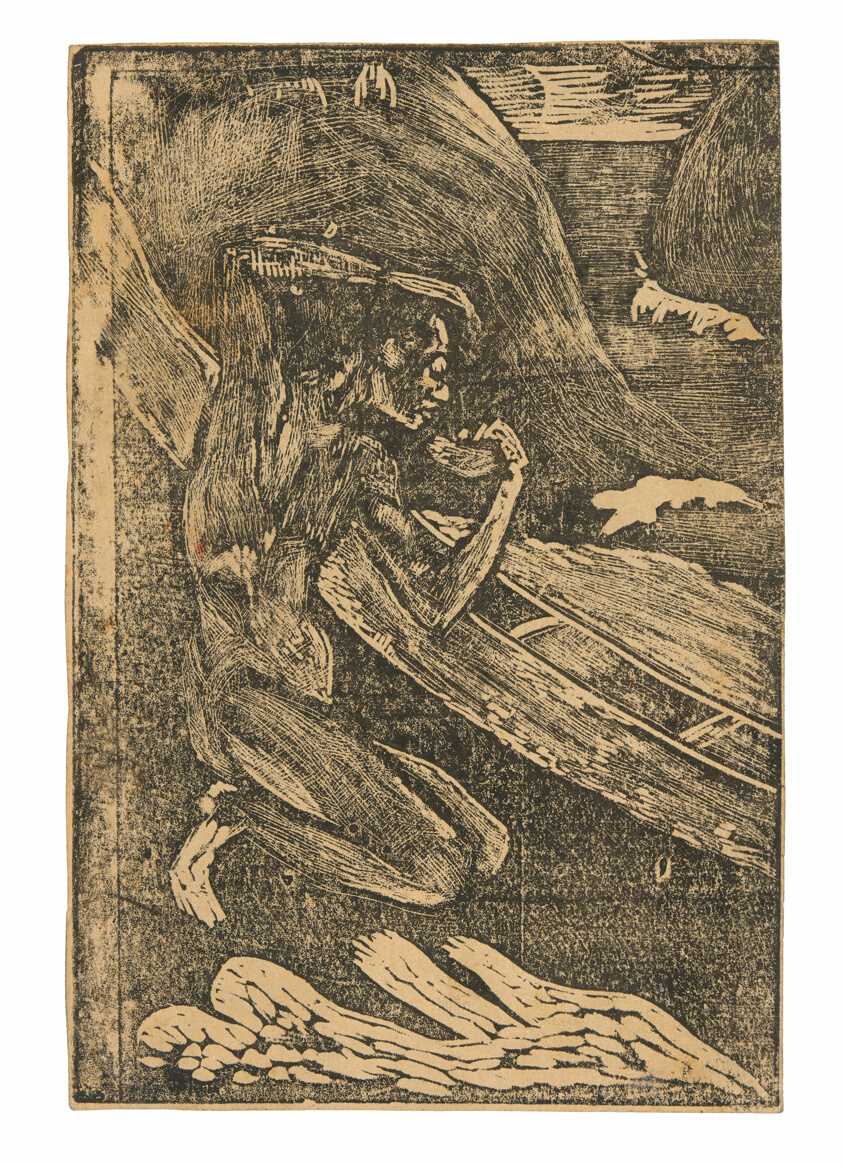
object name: Print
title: A Fisherman Drinking Beside His Canoe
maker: Paul Gauguin (French, 1848-1903)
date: 1894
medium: Wood-block print in black ink on tan wove paper (recto); wood-block print in black ink, over stencil-applied red and yellow ink, on cream wove paper (verso)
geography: France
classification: woodcut; print; prints and drawing